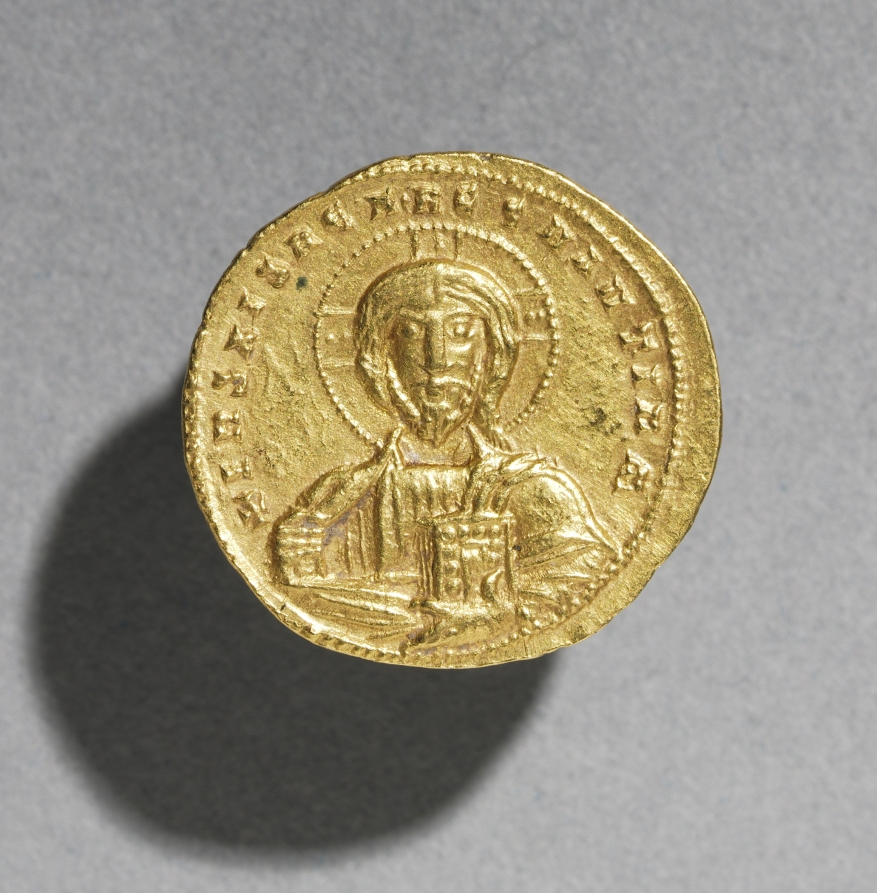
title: Nomisma with Nicephorus II Phocas (obverse)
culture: Byzantium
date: c. 963–969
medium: gold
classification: Coins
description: Byzantine Gold Coins The vast number of surviving Byzantine coins attests to the level of trade across the empire. Controlled and supervised by the emperor, the producers of coins took care to represent his authority and reflect his stature. Talented artists were recruited to engrave the dies (molds) used for the striking of coins. Emperors increasingly came to include their heirs and co-emperors on their coinage, as well as other family members or even earlier rulers. Coins were recognized, then as now, as small, portable works of art. With their inscriptions and images, Byzantine coins provide valuable documentation of historical events and a record of the physical appearance of the emperors. The coins shown here include the solidus, the basic gold coin of 24 karats; the tremissis, a gold coin of one-third the weight and value of the solidus; and the nomisma, which in the 10th century replaced the solidus as the standard gold coin.